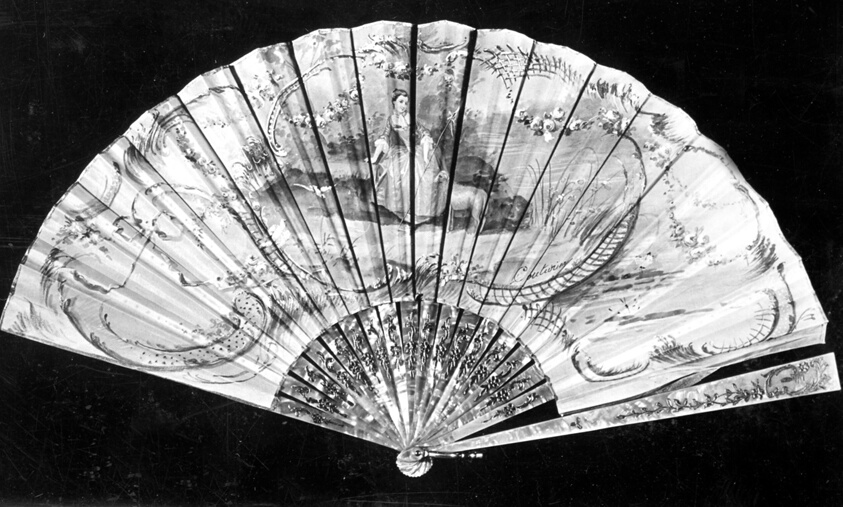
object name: Costume and Accessories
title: Fan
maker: France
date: c. 1880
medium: Carved and gilded pearl sticks with guards painted silk mount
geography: France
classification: textile; fan - weaving; costume accessory - folding fan; costume accessory; costume